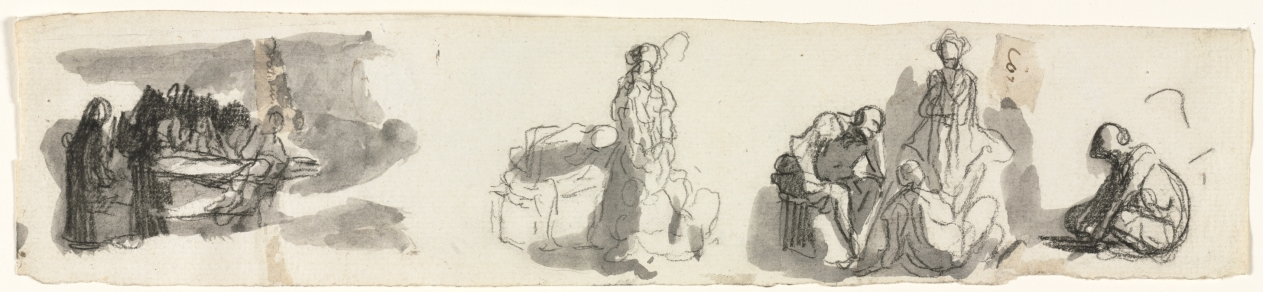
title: Sheet of Studies with a Group of Four Figures to the Right (recto)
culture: France, 19th century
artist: Honoré Daumier (French, 1808–1879)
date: 1850–75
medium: black chalk and brush and gray wash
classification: Drawing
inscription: ON A SEPERATELY APPLIED PIECE OF PAPER, upper left, in gray ink: [illegible, cropped] ; ON A SEPERATELY APPLIED PIECE OF PAPER, upper right, in gray ink: co[cropped]